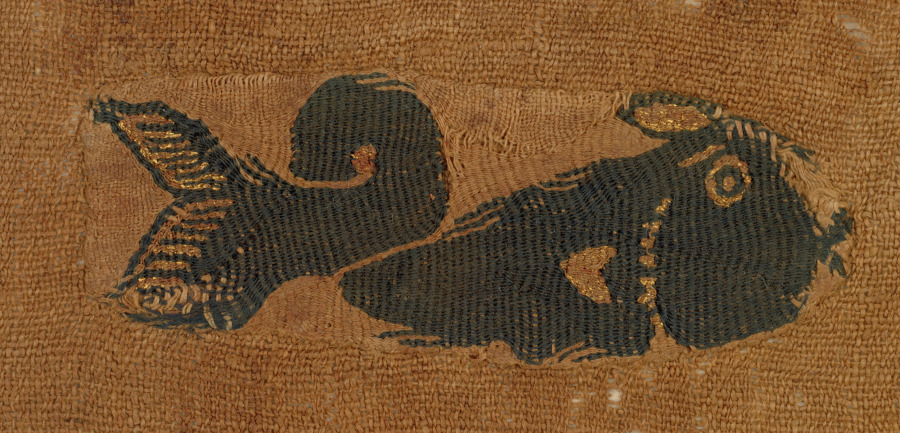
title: Two Fragments from a Curtain: Dolphins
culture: Egypt, Byzantine period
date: 400s - 500s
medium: tapestry (originally inwoven in tabby ground); wool, linen and gold filé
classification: Textile